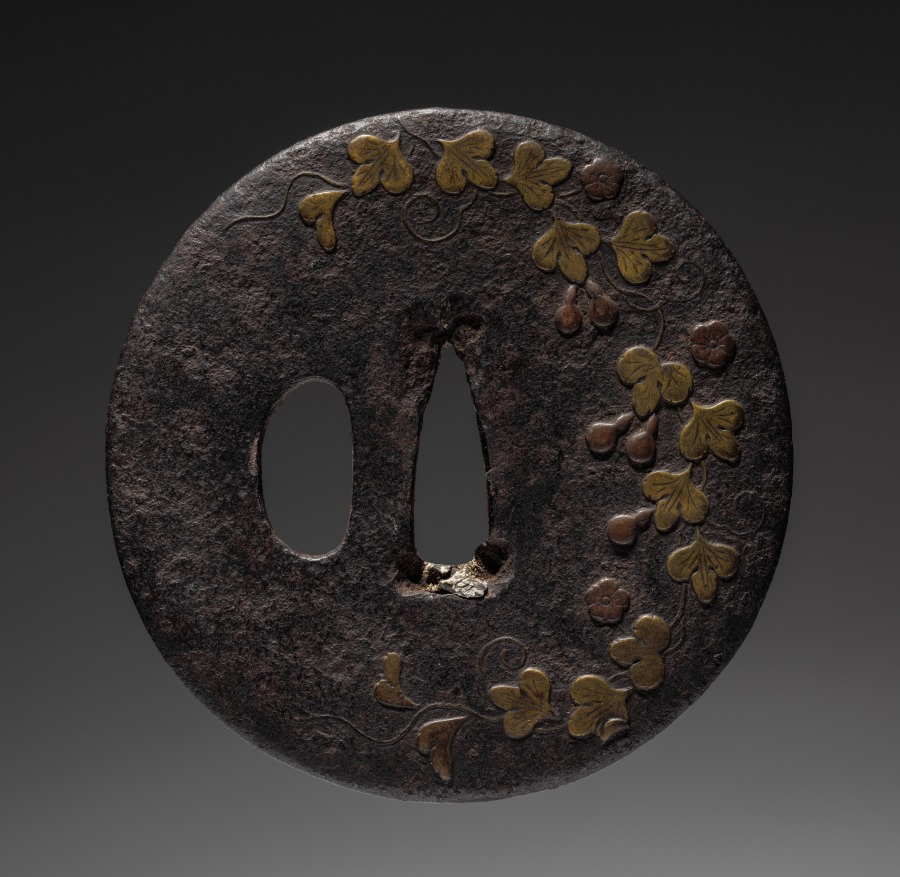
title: Sword Guard (Tsuba) with Gourds on Vine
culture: Japan, possibly Edo period (1615-1868)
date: c. 1615–1868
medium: iron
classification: Arms and Armor